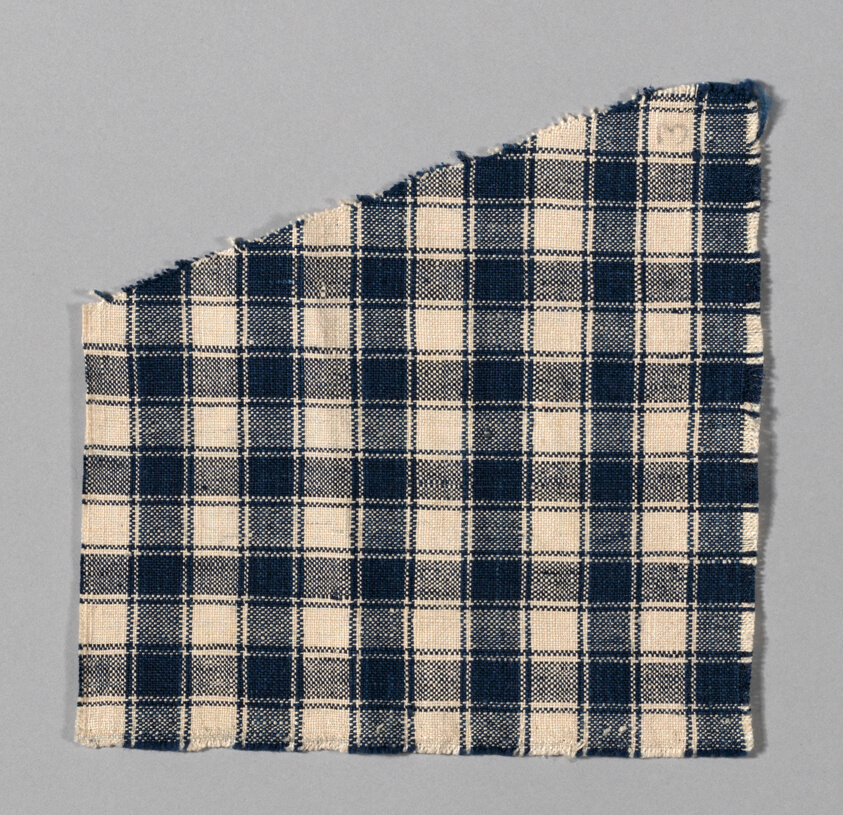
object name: Textile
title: Fragment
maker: United States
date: 1801/25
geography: United States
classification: textile; weaving